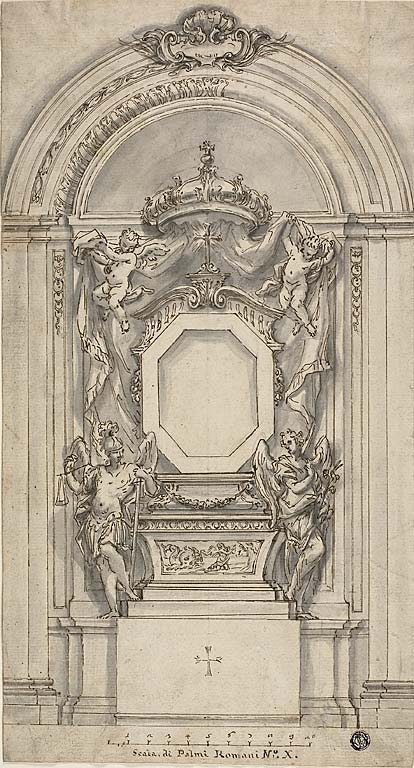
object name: Drawing and Watercolor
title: Design for a Tomb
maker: School of Francesco Solimena (Italian, 1657-1747)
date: 1677/1747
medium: Pen and brown ink, with brush and gray wash, over traces of black chalk, on ivory laid paper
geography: Italy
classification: pen and ink drawings; drawings (visual works); prints and drawing